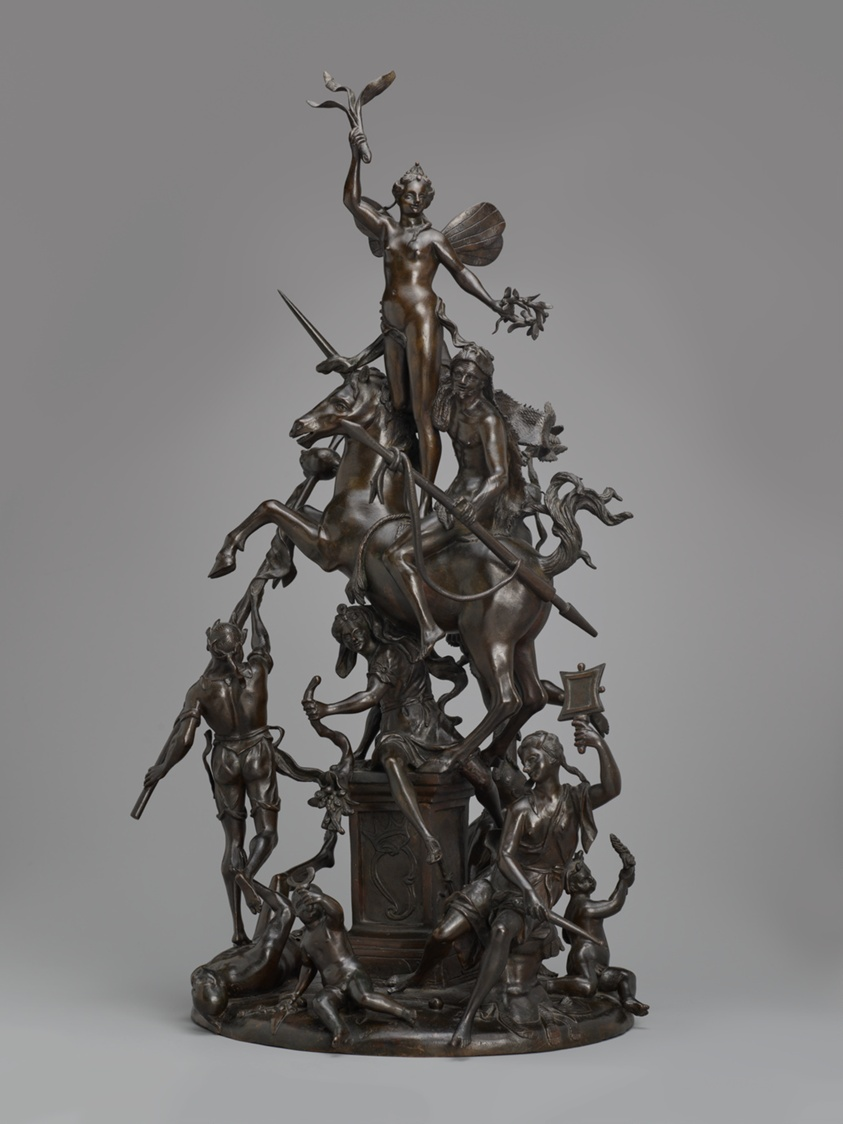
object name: Sculpture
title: Allegorical Group of Victory Supported by Valor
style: 18th Century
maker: Francesco Bertos (Italian, active c. 1693–1739)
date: 1700/10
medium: Bronze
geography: Italy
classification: statuette; Italian; sculpture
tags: victory, woman, weapons, unicorns, sculpture, nudes, mirror, men, laurel wreaths, head, crowns, children, animals